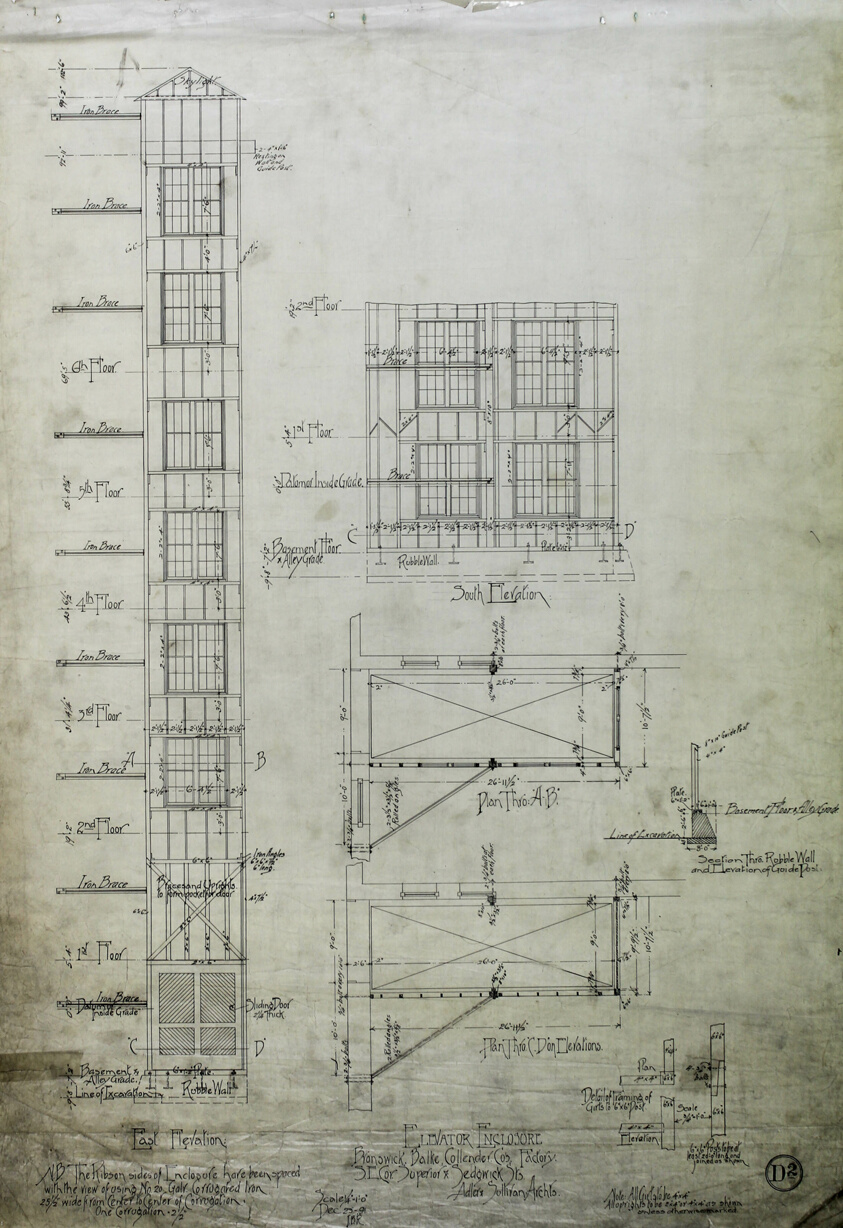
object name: Architectural Drawing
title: Brunswick Balke Collender Company Factory Building, Chicago, Illinois, Multiple Views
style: 19th century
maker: Adler & Sullivan, Architects; American, 1883-1895; Delineator: Curth, William F.; American, 19th cen.; Delineator: Gill, Irving J.; American, 1870-1936; Delineator: Self, Charles J.; American, 19th Cen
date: 1891 Destroyed by fire on April 15, 1989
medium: Black and red ink on linen with pencil notes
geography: United States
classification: architectural drawing; architecture; architectural working drawing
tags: Chicago, office buildings, buildings, architecture, plan, elevations (building divisions), design, illinois